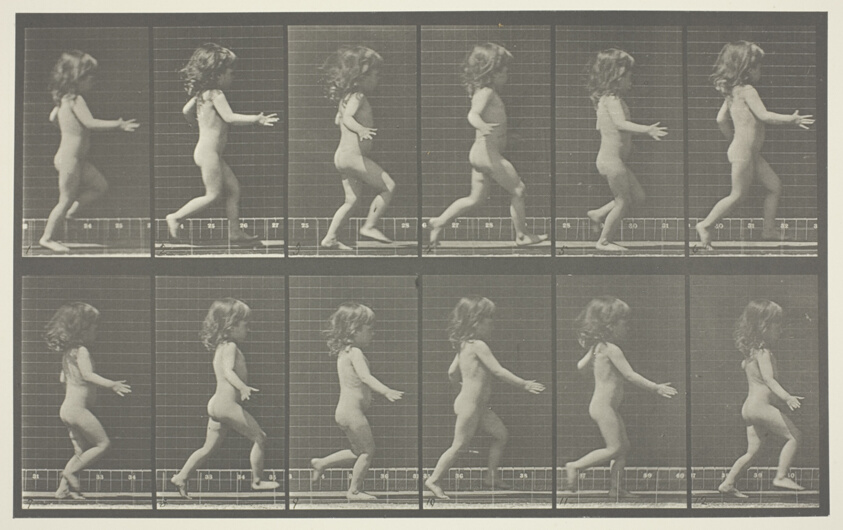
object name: Photograph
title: Animal Locomotion, Plate 469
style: 19th century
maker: Eadweard Muybridge (English, active United States, 1830–1904)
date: 1887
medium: Collotype, from "Animal Locomotive"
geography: England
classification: photograph; collotype; photography